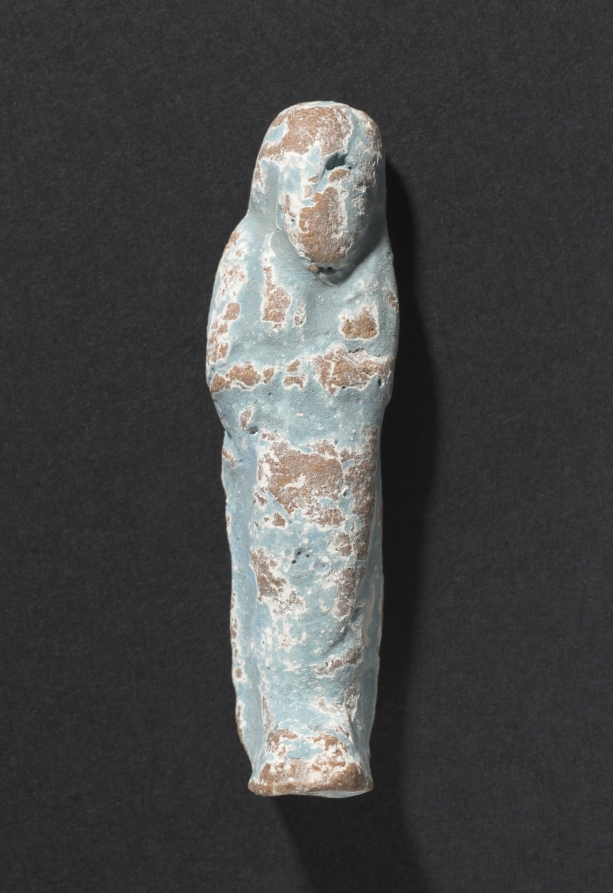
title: Shawabty of Ditamenpaankh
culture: Egypt, Late period (715–332 BCE), Dynasty 25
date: 715–656 BCE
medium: terracotta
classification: Funerary Equipment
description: High demand for shawabtys in the Late Period, a time when as many as 400 or more shawabtys were placed in the tomb with the deceased, gave rise to a specialized container for storing them: the shawabty box. This example is inscribed for the lady of the house, Ditamenpaankh, and was probably one of a pair originally made for her. The single-masted boat on the box’s lid is perhaps an allusion to the pilgrimage of the deceased to the holy city of Abydos, the cult city of Osiris, king of the dead. The shawabtys inside are crude, mass-produced examples cast in an open mold. Made of terracotta, their blue paint imitates more costly shawabtys made of faience. As for the shawabty spell, it has been removed from its traditional location on the shawabty’s front and relocated onto the sides of box, where it needed only to be written once, thus expediting production.